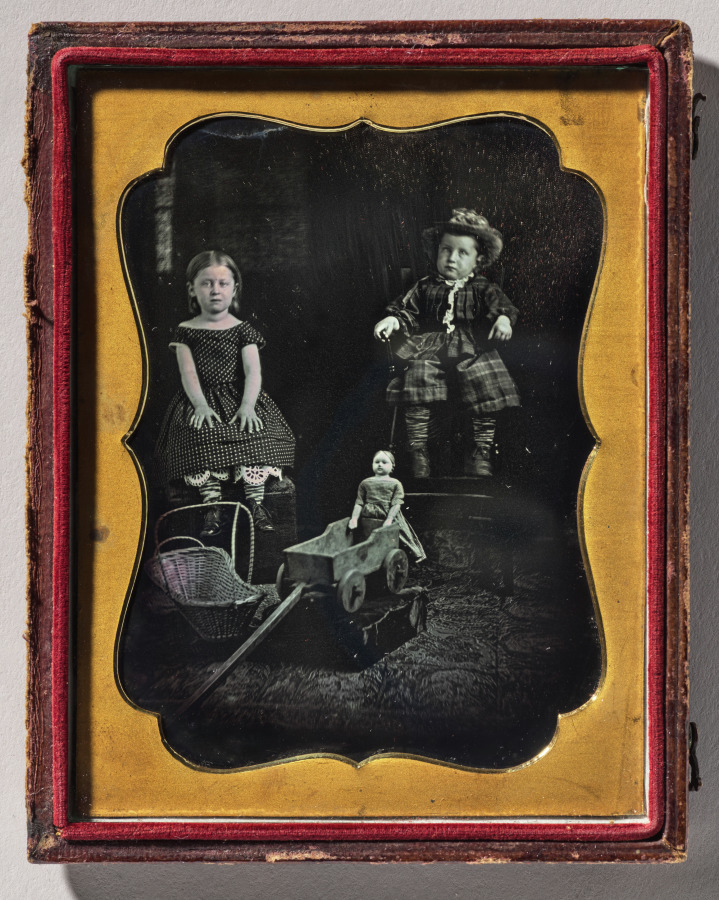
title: Two Children with Toys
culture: America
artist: Unidentified Photographer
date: c. 1855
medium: daguerreotype, quarter-plate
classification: Photograph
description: Children have always been particularly cherished subjects for photography. Portraits were made to preserve the memory of their stages of growth and, in an age when long-distance travel was rare, to share with faraway relatives. And, for a sadder reason: in 1840 an estimated one-third of children died before age five. Photography offered grieving parents the opportunity to immortalize their children’s features. This tragic genre of photographs, later called “post-mortems,” often depicts the children in fine clothing, laying down with eyes shut, as if merely napping.